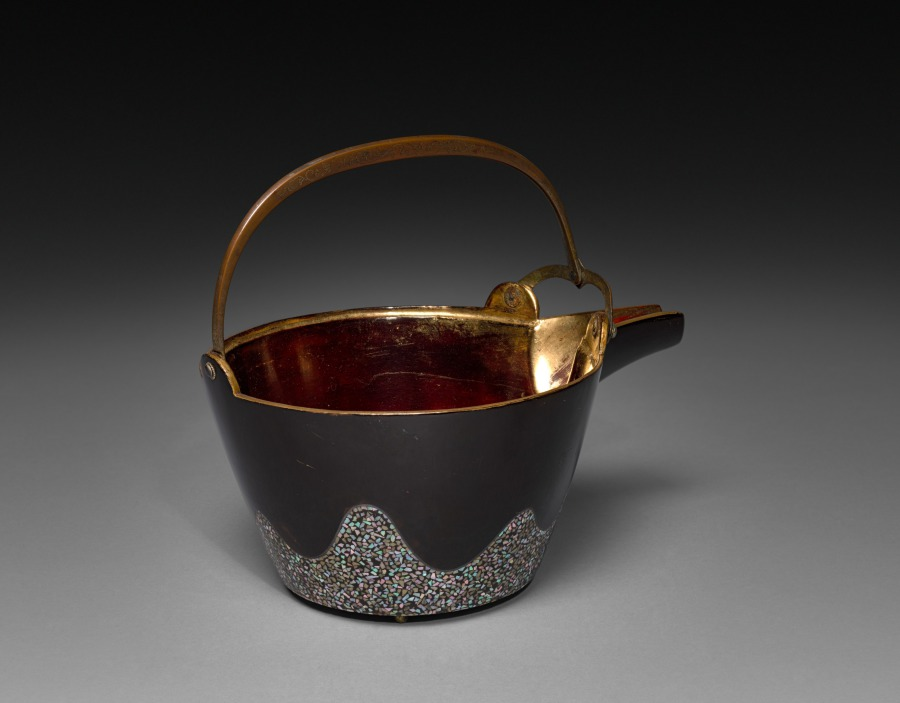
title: Wine Ewer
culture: Japan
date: late 1700's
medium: lacquer, nacre and metal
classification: Lacquer